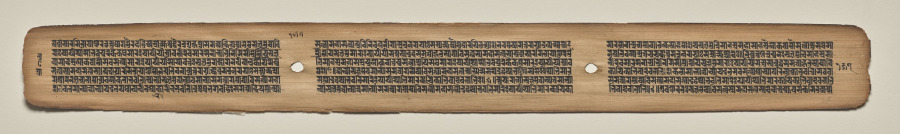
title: Text, folio 157 (verso), from a Manuscript of the Perfection of Wisdom in Eight Thousand Lines (Ashtasahasrika Prajnaparamita-sutra)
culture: Eastern India, Bihar, Vikramashila Monastery. Painting: Nepal, Kathmandu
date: Sunday, September 14, 1119 (year 239 of the Newar Samvat in the month of Ashvina)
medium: gum tempera and ink on palm leaves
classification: Painting